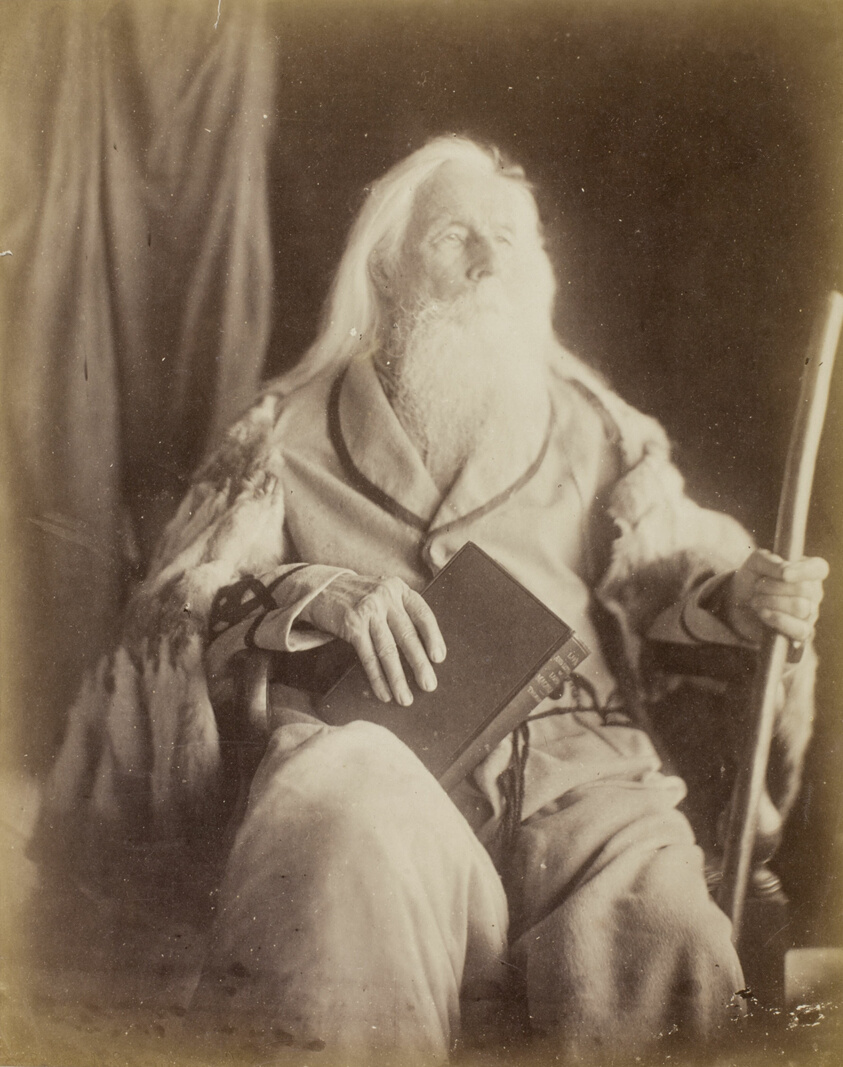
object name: Photograph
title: Charles Hay Cameron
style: 19th century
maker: Julia Margaret Cameron (English, 1815–1879)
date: 1864/65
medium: Albumen print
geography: England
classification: albumen silver print; photographic process; photography; photograph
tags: portraits, portraits: male subject, photography